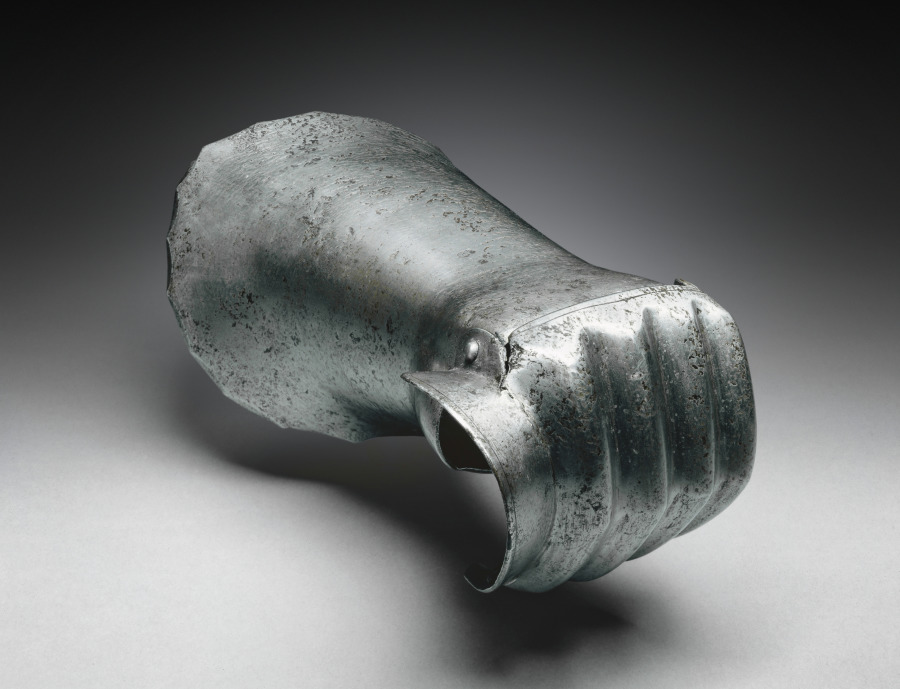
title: Jousting Glove (Main-de-Fer Gauntlet)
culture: South Germany, 16th century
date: c.1530–60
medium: steel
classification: Arms and Armor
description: This armor was developed for the joust--a sporting combat between two mounted contestants. Although all of the elements of this armor date from the same period, they are not all from the same suit. This armor is thus called "composed." It also shows the asymmetry of jousting armor. The participants rode along a wall-like barrier known as a "tilt" with their left sides facing one another. Consequently, armor on that side of the body had to be thicker. Note the large plate (grandguard) over the left shoulder for extra protection. Also, the breathing holes in the helmet were placed on the right side (farthest from an opponent's lance) to avoid injuries from splinters. The bracket attached to the right breastplate is called the lance-rest, a shock-absorbing support designed to accommodate the lance when "couched" under the right armpit.